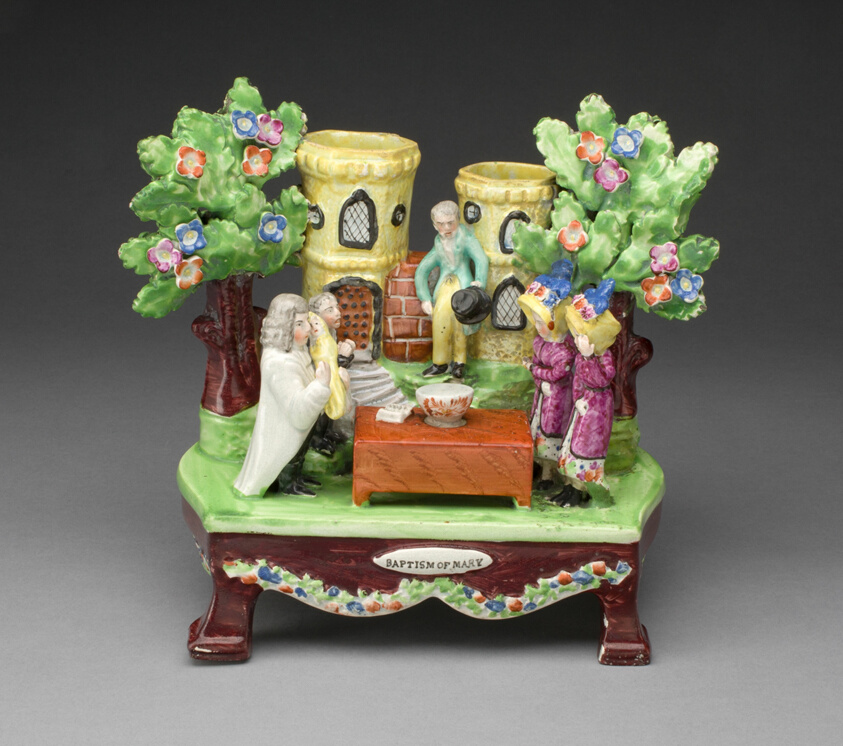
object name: Ceramics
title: Chimney Ornament: Baptism of Mary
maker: England, Staffordshire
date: c. 1820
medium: Glazed earthenware with polychrome enamel decoration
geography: Staffordshire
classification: ceramics; european decorative arts